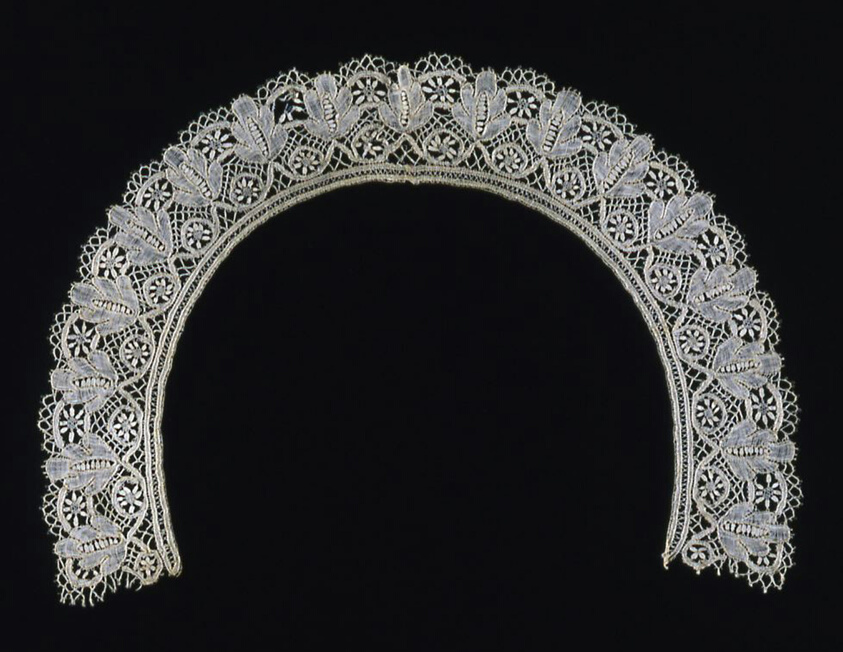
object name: Textile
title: Collar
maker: Belgium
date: 1850s/60s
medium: Cotton and linen, bobbin straight lace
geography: Belgium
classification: textile; lace - bobbin; lace